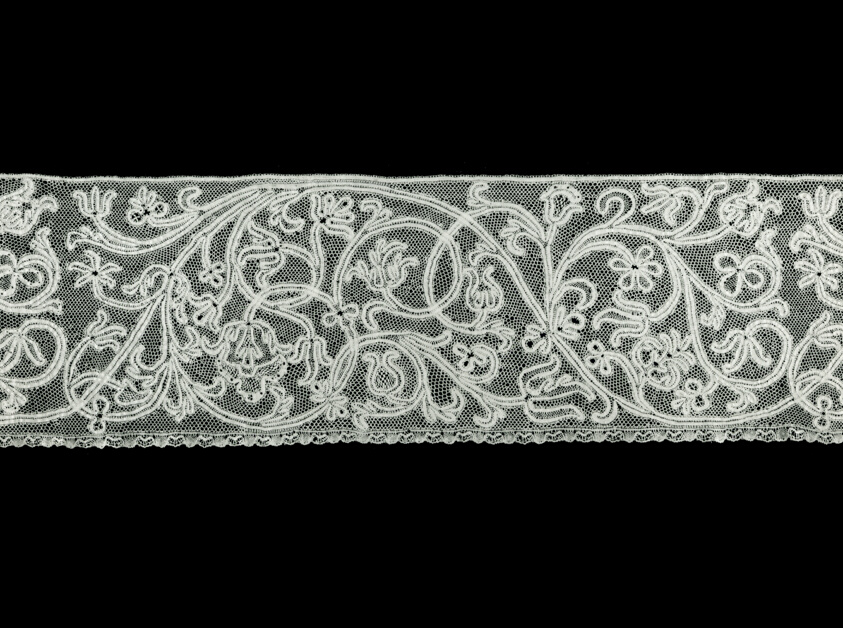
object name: Textile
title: Flounce (Possibly From an Alb)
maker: Italy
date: 1701/50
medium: Linen, bobbin part lace (continuous clothwork tapes)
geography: Italy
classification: textile; lace - bobbin